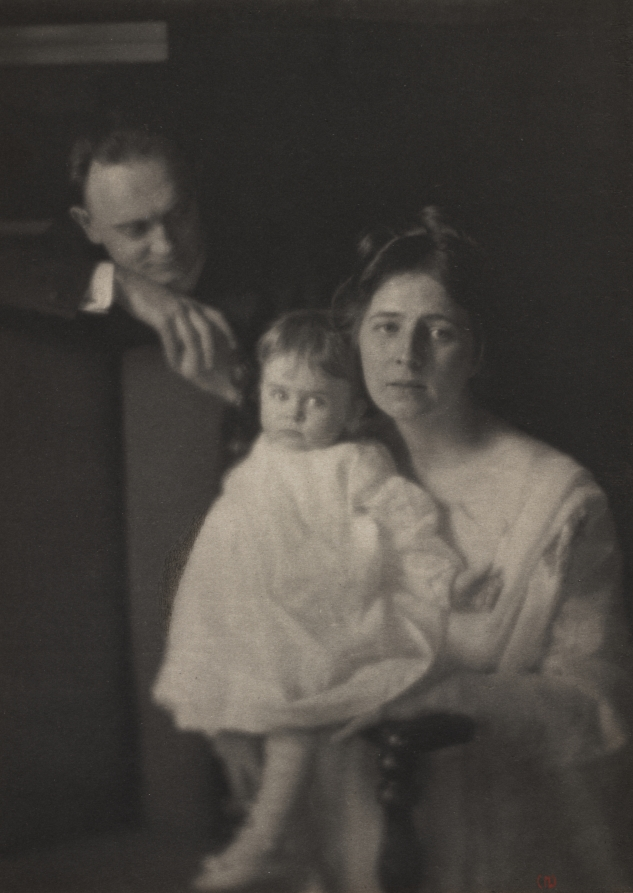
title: Walter L. Flory, Julia McCune Flory, and Phoebe Flory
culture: America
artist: Clarence H. White (American, 1871–1925)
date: 1915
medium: platinum print with pencil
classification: Photograph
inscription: Written in red ink on recto: "CHW"; in pencil on recto of original mount: "Clarence H. White [signed] '15"